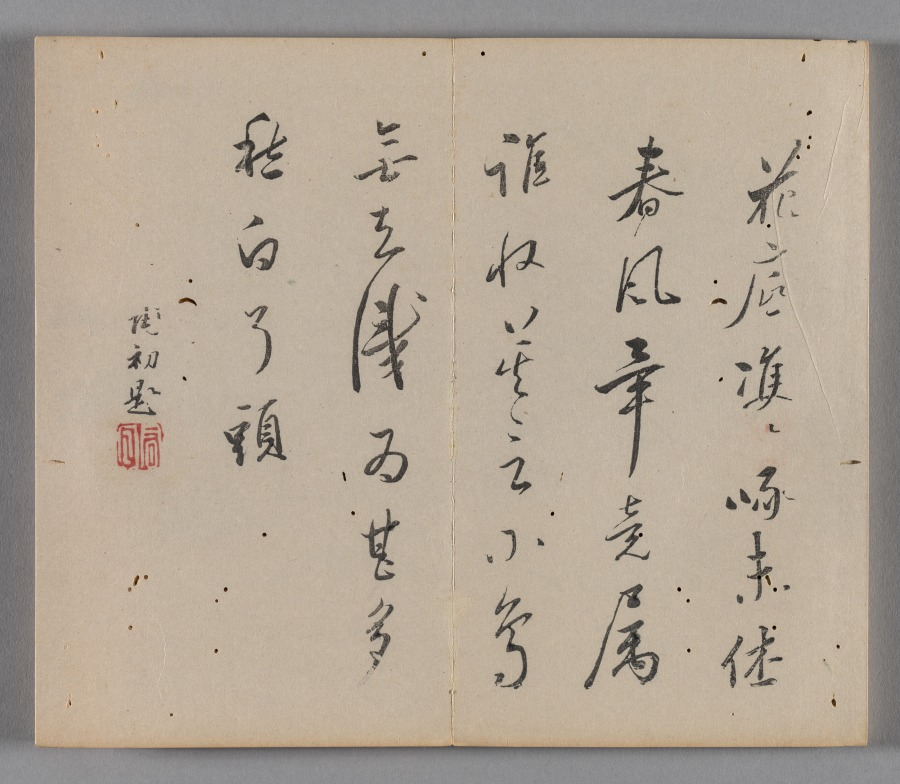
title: Ten Bamboo Studio Painting and Calligraphy Handbook (Shizhuzhai shuhua pu): Miscellaneous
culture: China, Qing dynasty (1644-1911)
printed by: Hu Zhengyan (Chinese, c. 1584–1674)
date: 1633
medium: Woodblock-printed book; ink and colors on paper; first edition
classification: Print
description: Color printing reached a level of perfection in the early 1600s, as seen in this Ten Bamboo Studio Collection of Calligraphy and Painting and the Mustard Seed Garden Manual of Painting (printed 1679 and 1701). The painterly quality, precision in registering (aligning) the woodblocks, and harmonious colors made them the most successful color print editions in Chinese history. Both editions were printed and compiled in Nanjing, spread nationwide, and had a great impact on the arts in Japan and Korea.